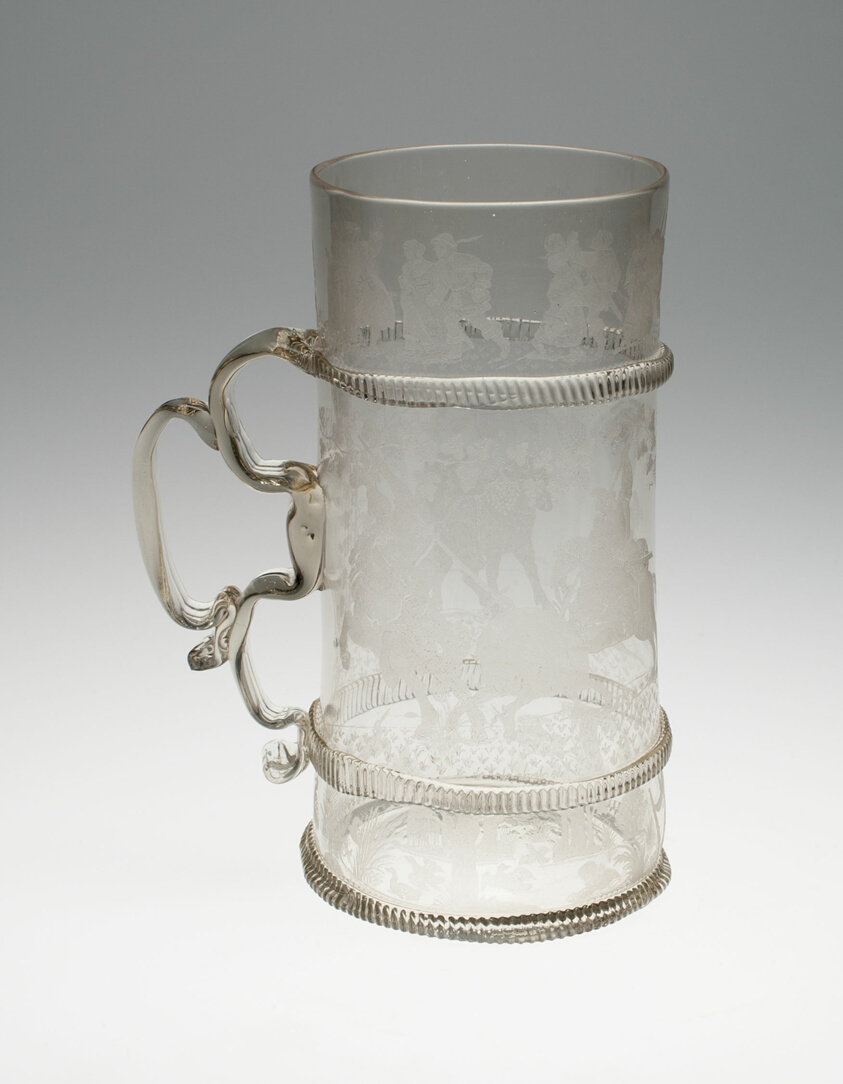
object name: Glass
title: Tankard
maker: Dutch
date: 19th century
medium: Glass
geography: Spain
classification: drinking vessel; glass; european decorative arts